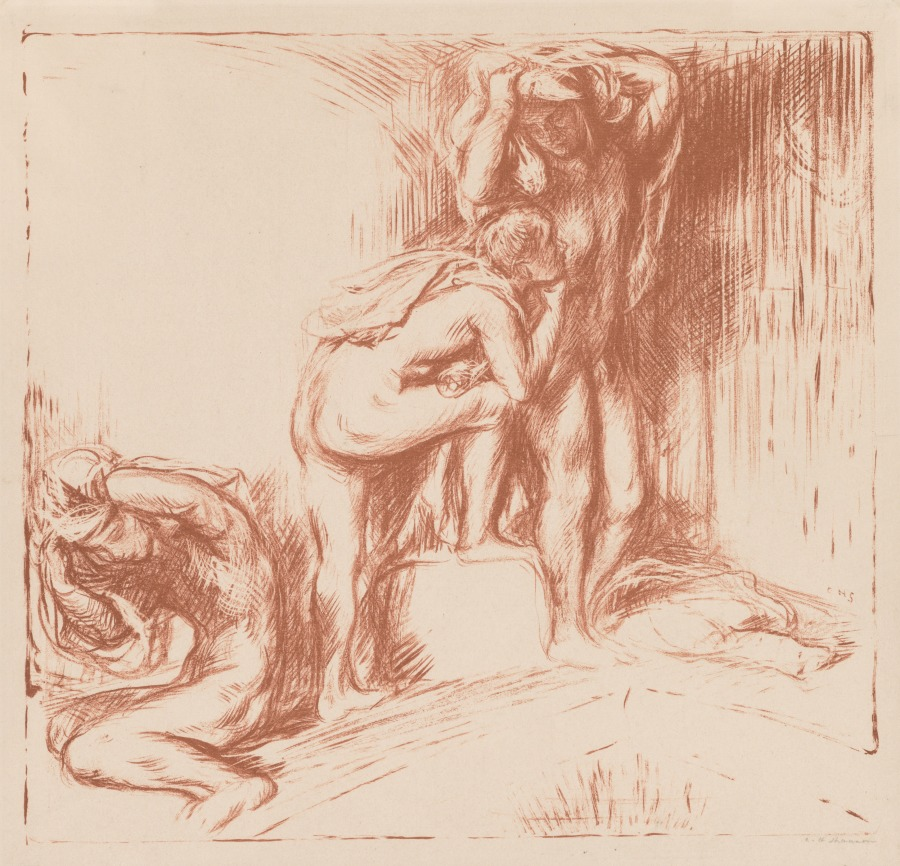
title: The Bath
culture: England, early 20th Century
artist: Charles Hasslewood Shannon (British, 1863–1937)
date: 1905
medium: lithograph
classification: Print